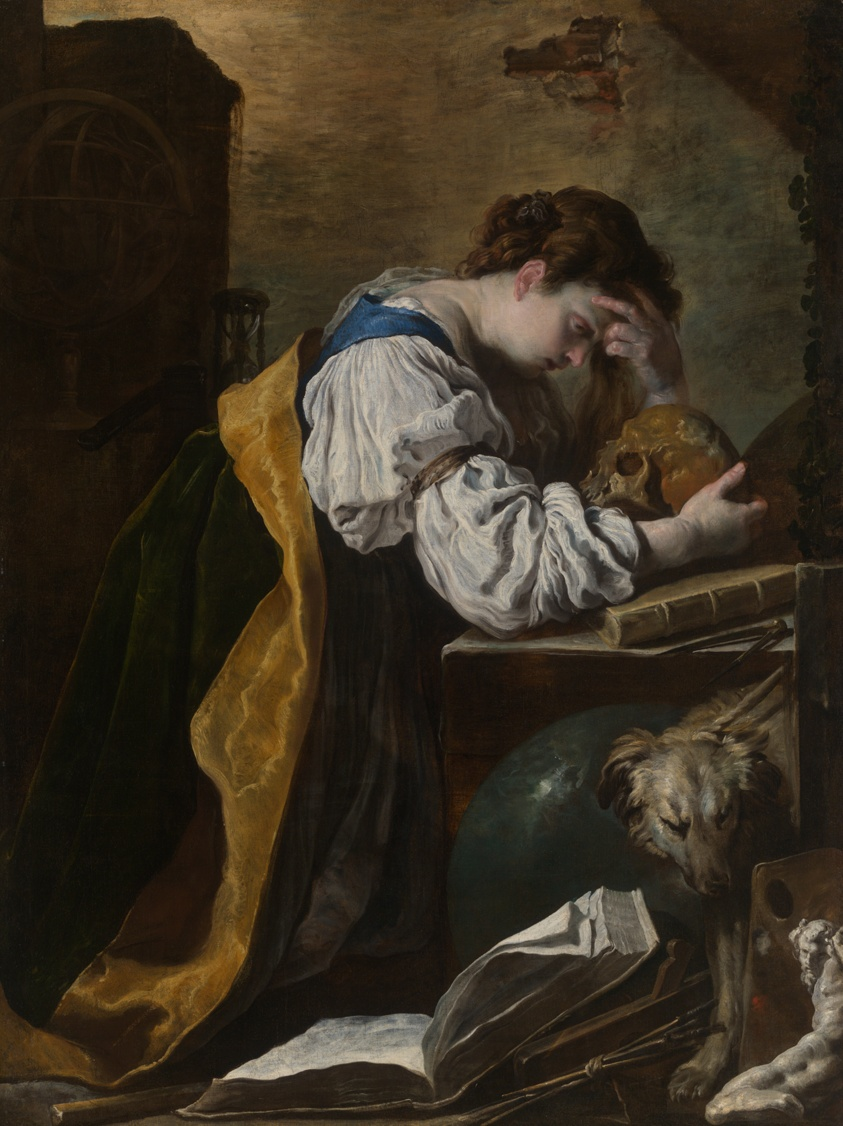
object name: Painting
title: Melancholia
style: 17th Century, Baroque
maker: Domenico Fetti (Italian, about 1591/92–1623)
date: c. 1615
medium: Oil on canvas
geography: Italy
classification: oil on canvas; european painting; Italian; oil paintings (visual works); paint; painting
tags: melancholy, animals, interior, Italy, temperaments, study, globes, hourglasses, armillary sphere, telescope, skulls, desks, dogs, books, woman